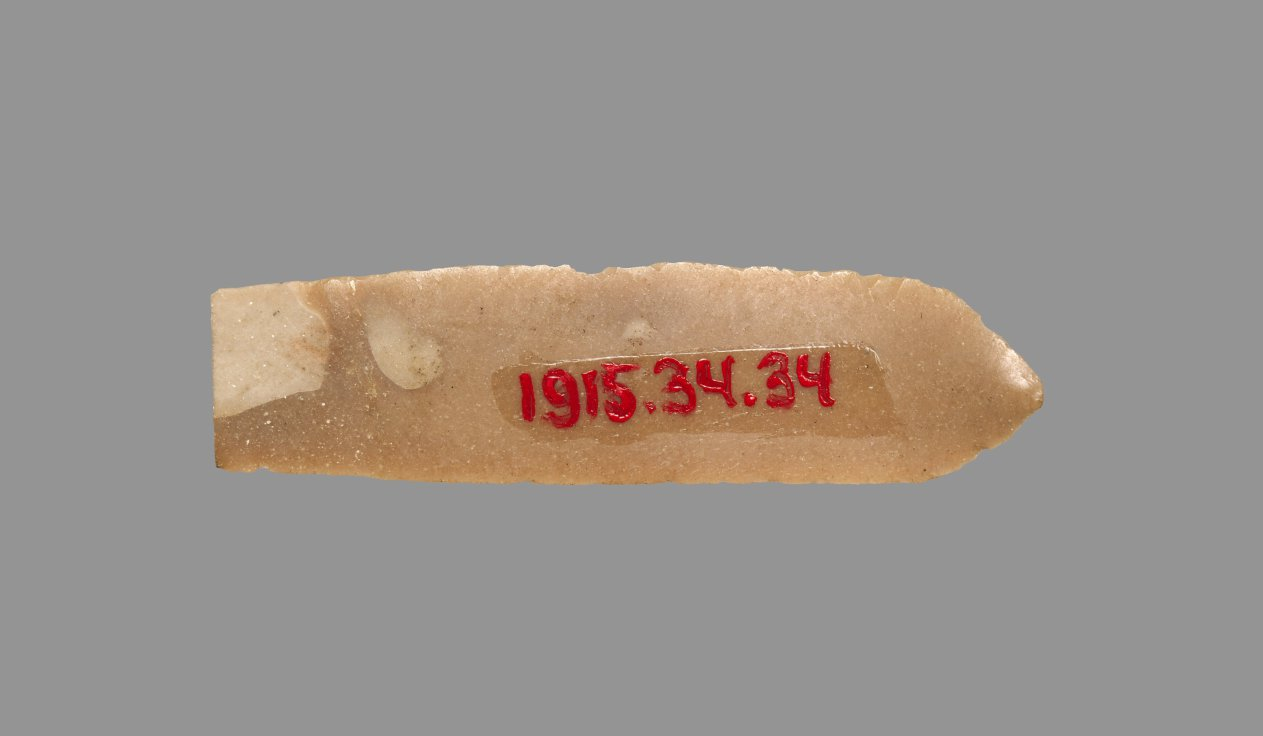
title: Sickle Blade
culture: Egypt, Middle Kingdom (2040–1648 BCE), Dynasty 12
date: 1980–1801 BCE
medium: flint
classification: Implements